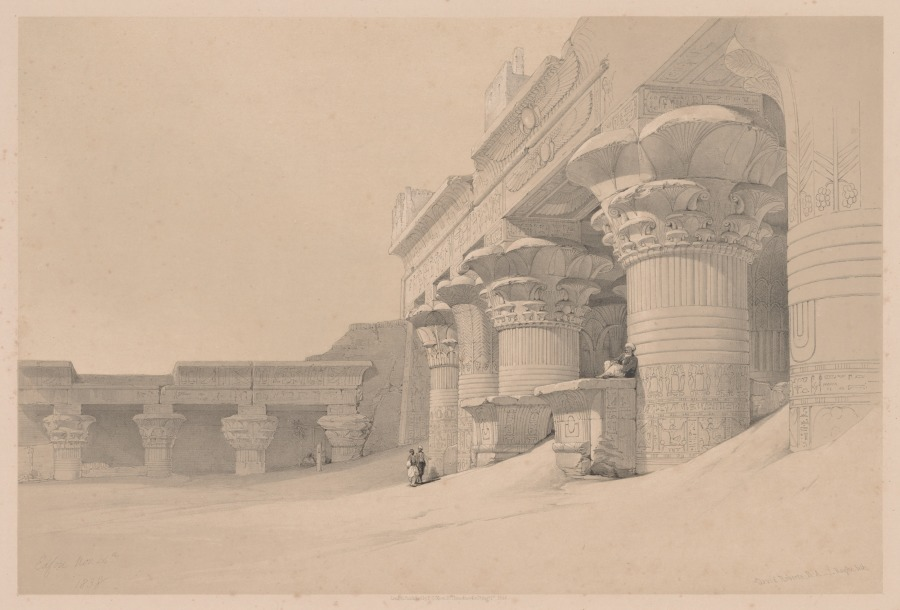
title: Egypt and Nubia: Volume I - No. 10, Edfou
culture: England, 19th century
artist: Louis Haghe (British, 1806–1885)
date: 1838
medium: color lithograph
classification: Print